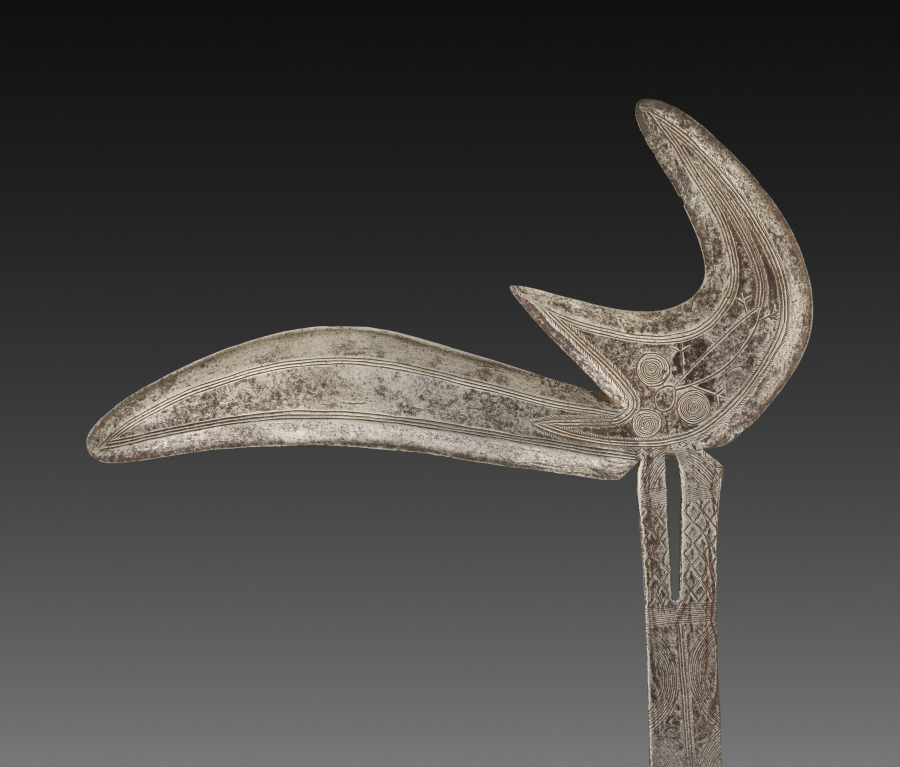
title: Throwing Knife / Prestige Scepter (pingha)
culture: Africa, Central or Eastern Africa, Democratic Republic of the Congo, Central African Republic, and Sudan, Zande-style maker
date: 1800–mid-1900s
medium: Iron alloy and plant fiber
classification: Arms and Armor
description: Throwing knives (pingha, plural kipinga) were historically used by elite Zande men as weapons in the late 1800s and early 1900s. Carefully calibrated, they would spin when thrown or balance on the shoulder when taken into battle. Kipinga were not everyday weapons, but considered property of the king; only those fighting on his behalf like royal bodyguards and court attendants used them. One side of this blade is adorned with complex figural and geometric engravings. No longer used for fighting, kipinga are now a sign of authority and heritage.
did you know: Look closely at the upper blade of this throwing knife to find a representation of a lizard, and at the lower part of the shaft for a crosshatch design resembling lizard skin.